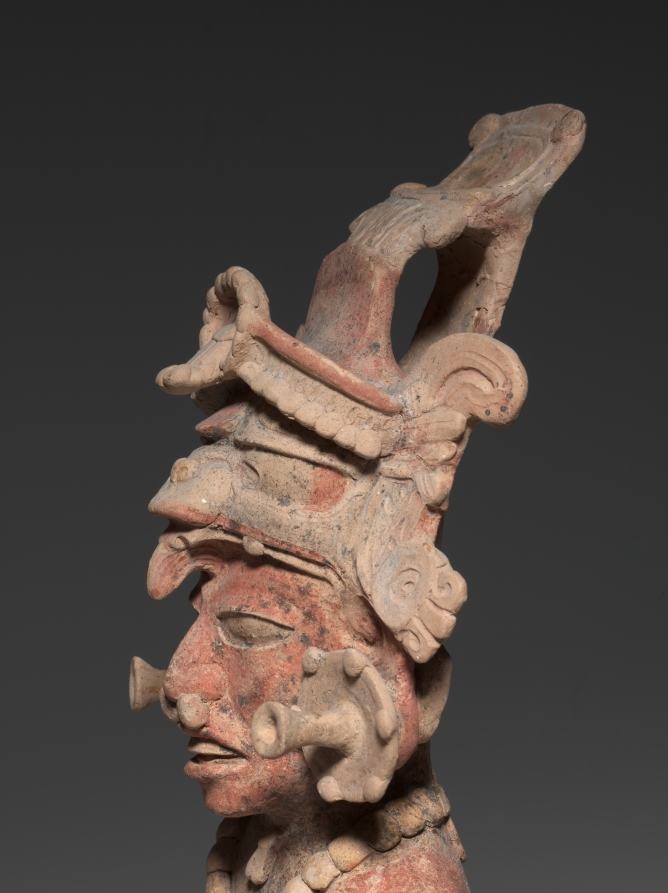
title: Artisan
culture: Guatemala, Petén region, Maya style (250-900), Maya style (250-900)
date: 250–600 CE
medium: earthenware with colored slips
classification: Sculpture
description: These figures represent the supernatural patrons of the visual arts and writing: the brothers Hun Batz and Hun Chuen ("One Monkey" and "One Artisan"). The two were refined artists but also bullies who tormented their younger brothers, who took revenge by transforming their elders into monkeys. Many Maya representations of the painter-scribes immortalize this fate by depicting the pair with both simian and human features, as here. The brothers are shown engaged in artistic or scribal pursuits. Sitting on high-domed bases that may have served as the lids of incense or offering bowls, each apparently once grasped a tool in his upper hand—for instance, a paint brush or a stylus for writing. In the lower hand, one cradles a small mask and the other, a piece of bark that likely refers to the beaten bark from which the Maya made books.